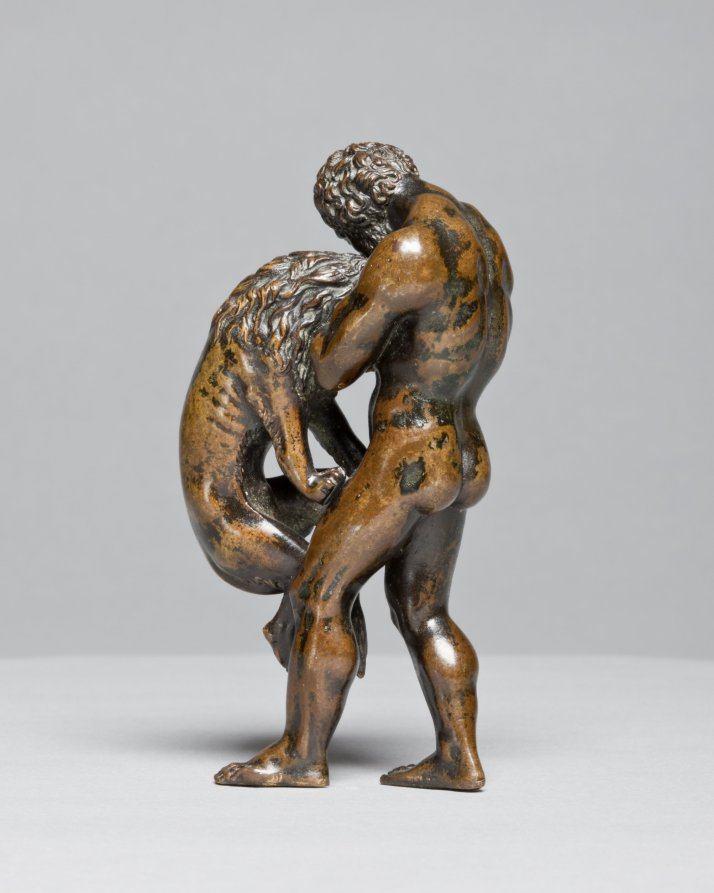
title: Hercules and the Nemean Lion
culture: Italy or France, 16th century or later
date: 1500s or later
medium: bronze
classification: Sculpture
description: The original owner of this work would have understood that this scene referred to the entire story of Hercules, the demi-god who had to accomplish twelve labors. The lion is named after the city of Nemea, near Corinth, a monstrous beast sent by the goddess Hera to wreak havoc on the area. After killing the lion, Hercules wore his pelt, commonly seen in other representations of the hero.